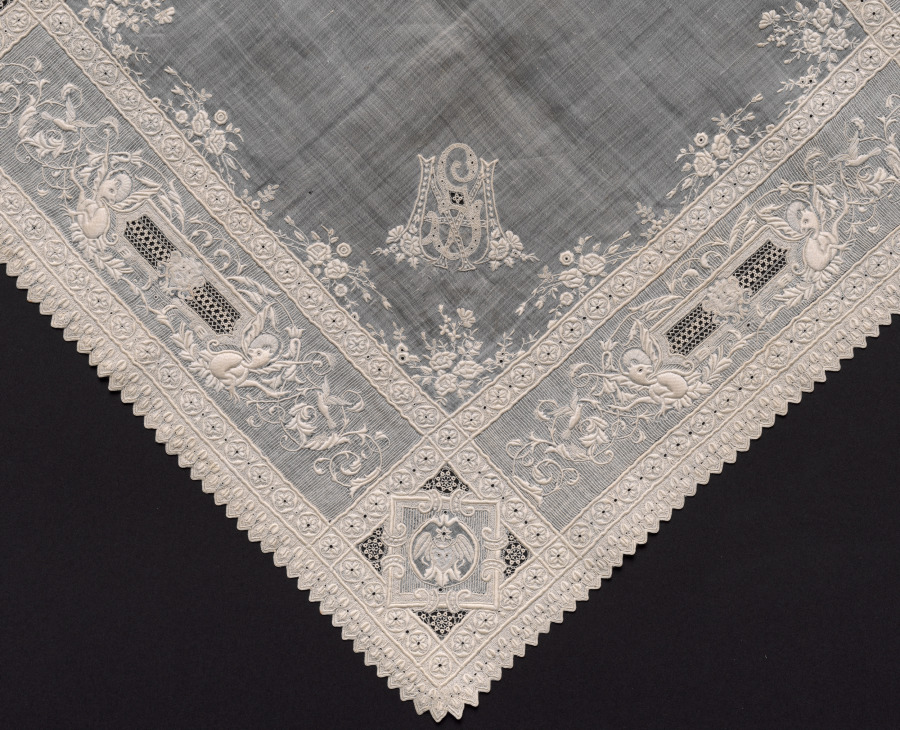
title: Lace Handkerchief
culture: France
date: 1800–1820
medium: Plain weave linen center: needle lace (drawnwork) and embroidery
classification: Embroidery